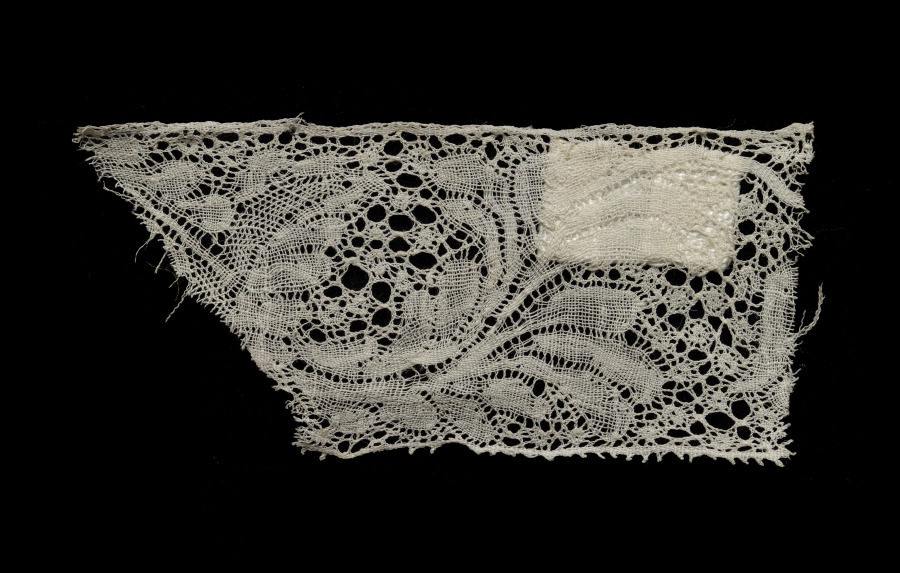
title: Lace Edging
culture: Belgium, Binche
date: 1700s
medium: Linen: bobbin lace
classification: Lace